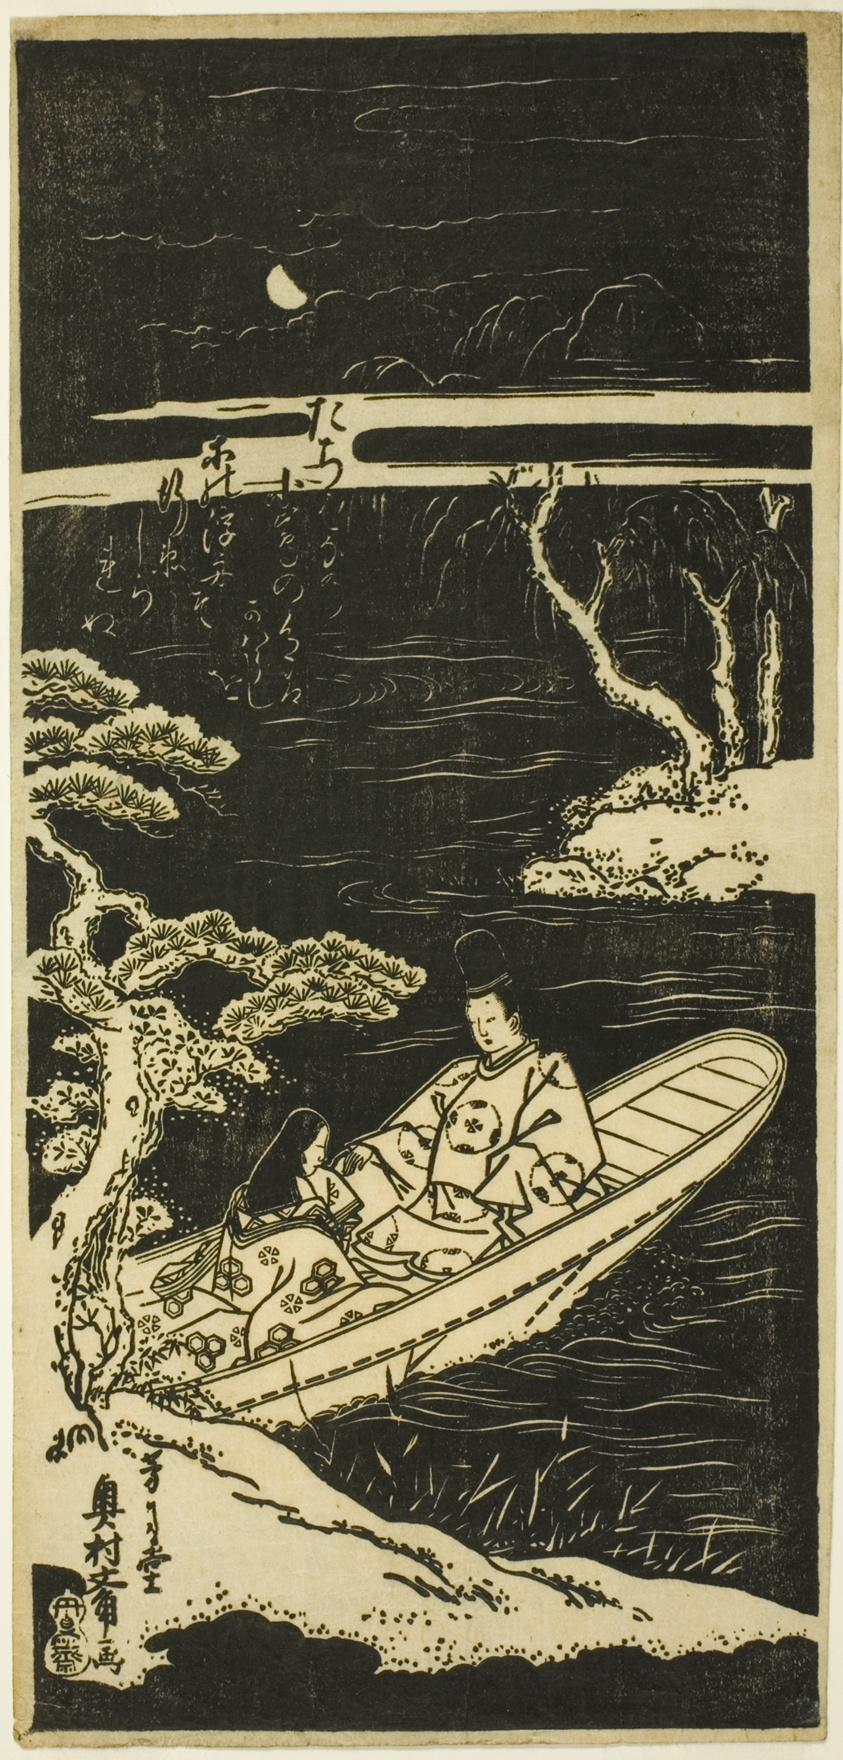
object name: Print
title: Ukifune and Ukon approach the island of Tachibana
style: Japanese (culture or style)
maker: Okumura Masanobu (Japanese, 1686-1764)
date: c.1740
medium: Woodblock print; hosoban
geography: Japan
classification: woodblock print; print; asian art; woodblock